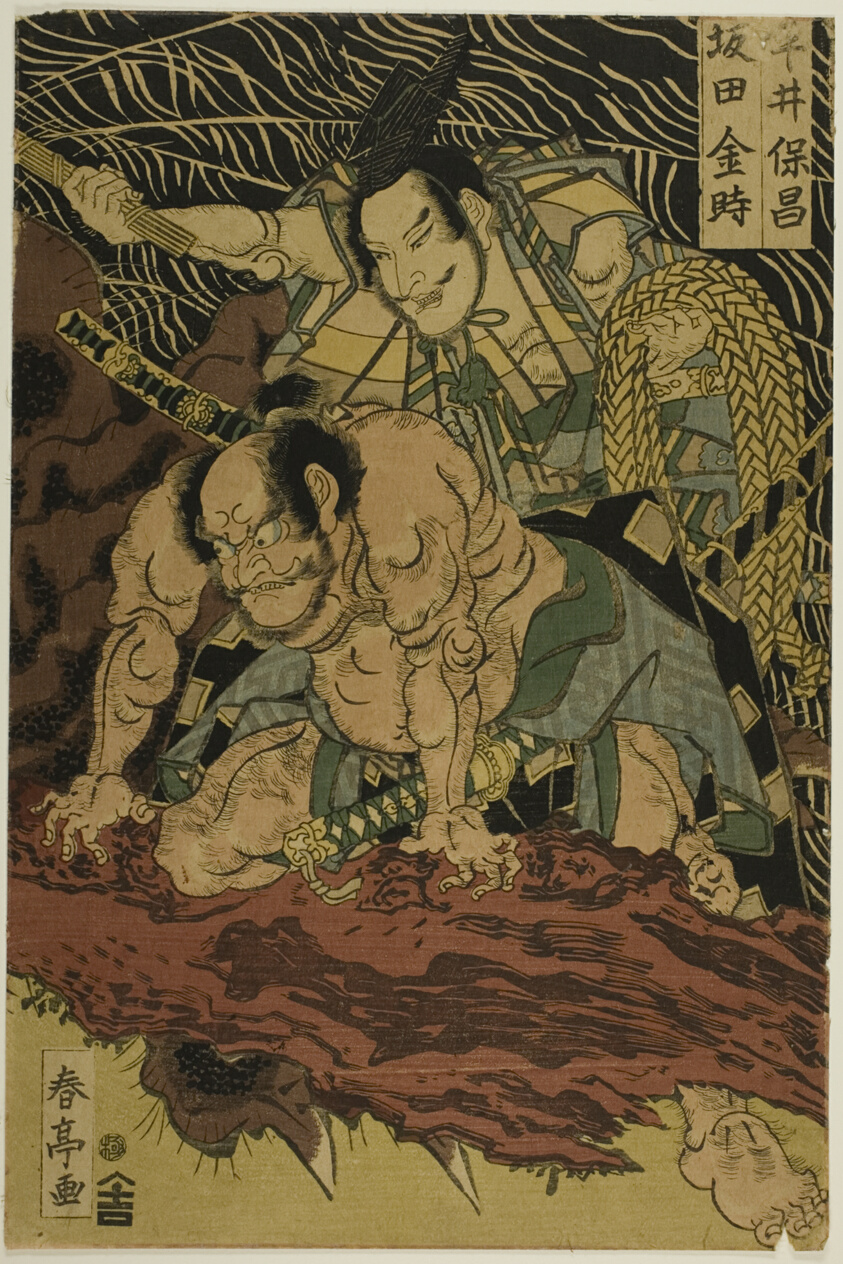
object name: Print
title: The Earth Spider Slain by Brave Samurai Watanabe no Tauna (center image)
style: Japanese (culture or style)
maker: Katsukawa Shunsho 勝川 春章; Japanese, 1726–1792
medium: Color woodblock print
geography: Japan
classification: woodblock print; print